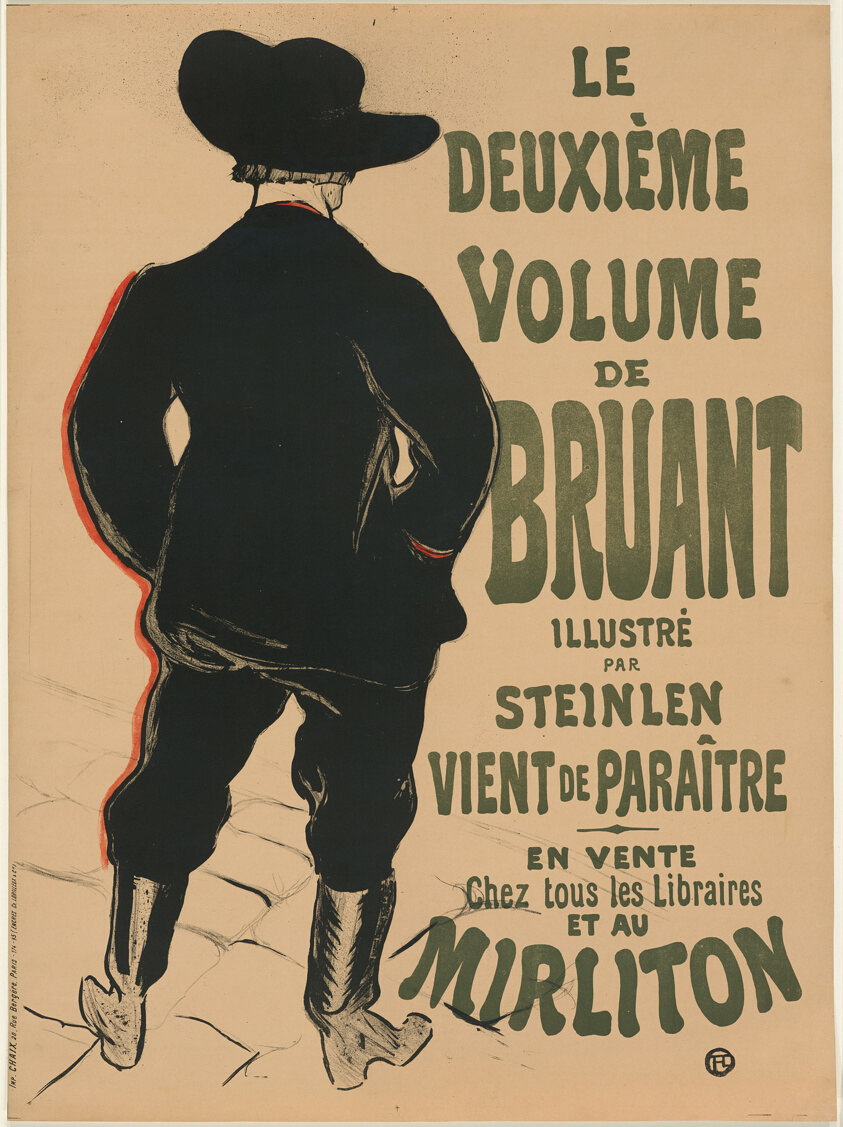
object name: Print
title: The Second Volume by Bruant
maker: Henri de Toulouse-Lautrec (French, 1864-1901)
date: 1893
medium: Color lithograph on tan wove paper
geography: France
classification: lithograph; print; prints and drawing; poster